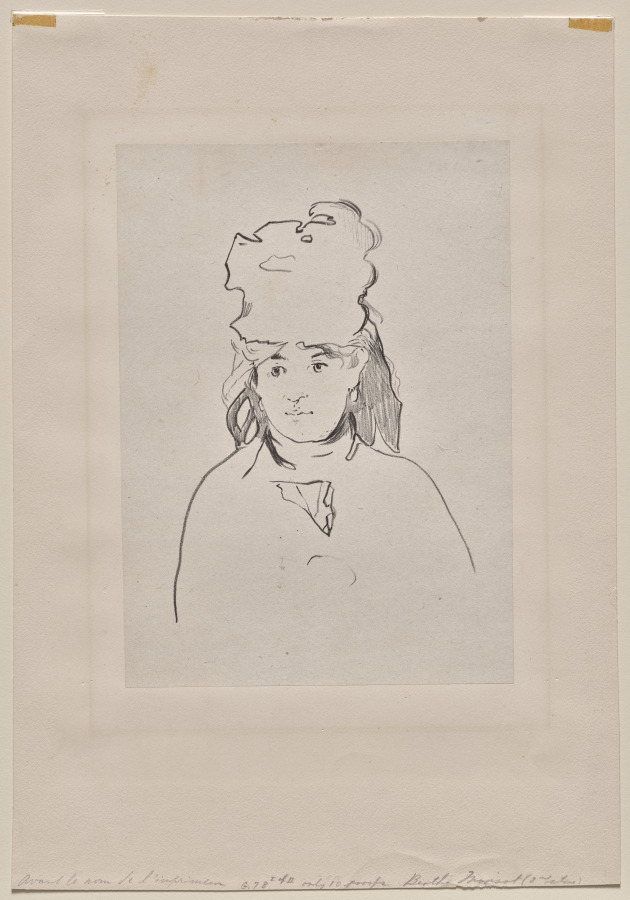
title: Berthe Morisot in Silhouette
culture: France, 19th century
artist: Édouard Manet (French, 1832–1883)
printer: Auguste Clot (French, 1858–1936)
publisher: Lemercier & Cie.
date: about 1872–74, printed 1884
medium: lithograph on chine collé, laid down on wove paper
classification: Print